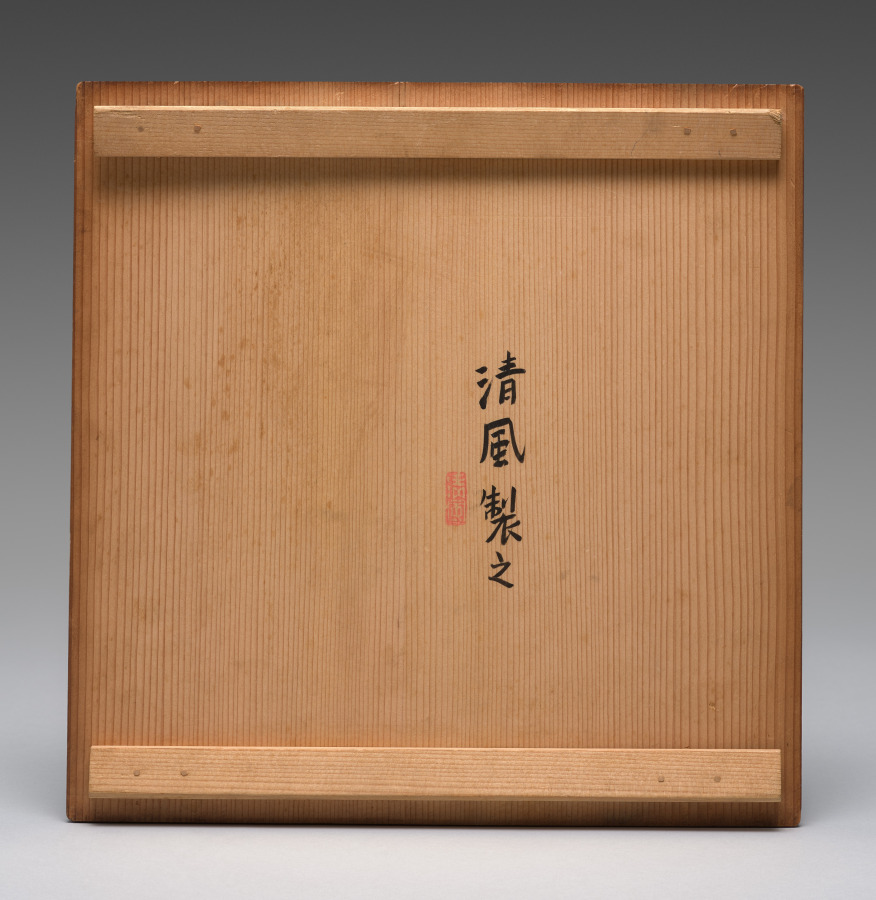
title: Pheasants in Cherry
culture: Japan, Meiji period (1868–1912)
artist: Seifū Yohei III (Japanese, 1851–1914)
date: 1900–1914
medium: Porcelain with molded and carved design, underglaze color, and cream glaze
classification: Ceramic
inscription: 大日本清風造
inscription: 清風製之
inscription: 清風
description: Like the design of Flower Vase with Phoenix in Paulownia (CMA 2022.199), the pair of pheasants in a dramatic landscape setting on this vase was created by adding clay to the surface of the clay body and then molding and carving it. Here, instead of a typical white clay, Yohei III has used an ivory clay. He then added gradated pink around the complex design, which with its multitude of cherry blossoms must have been painstaking to mask with precision. For the birds’ eyes, he added a touch of yellow. He then fired the vase with an allover translucent cream glaze. The resulting kanpakuji piece is one in which an academic subject long favored by painters of the Kano school for screen and sliding door paintings in important buildings, that of impressively sized birds within a scene of precipitous, angled rock faces and twisting trees, is made soft and ethereal while retaining a sense of gravitas.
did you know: The unusually large scale of this piece and the fact that he signed the base “Made by Seifū of Great Japan” also suggest that it was made for public display.